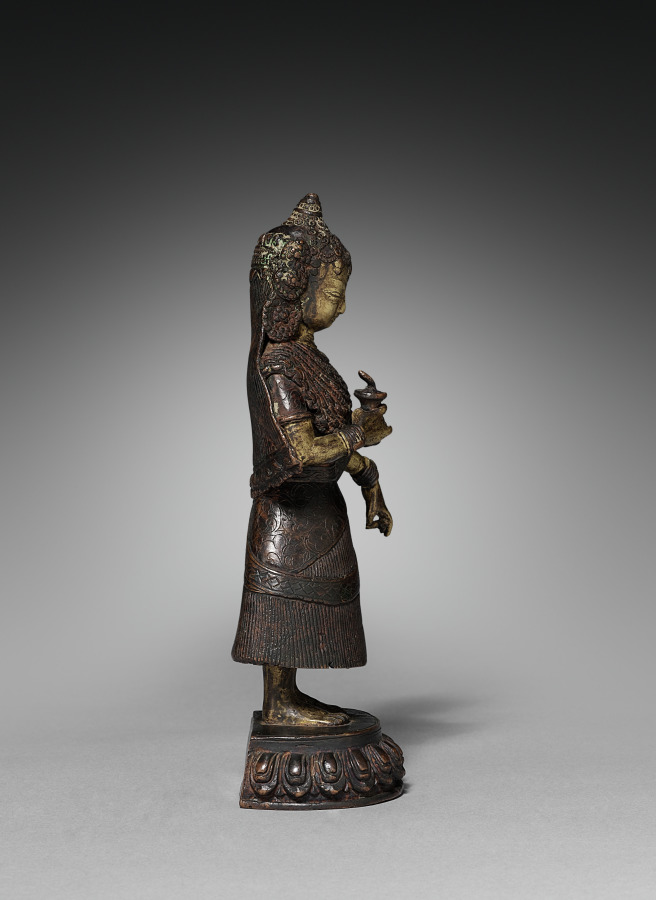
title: Royal Female Donor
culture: Nepal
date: c. 1500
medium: bronze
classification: Sculpture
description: Carrying a lamp in one hand, this female figure draped in finery was probably included as the donor of a sculptural group. She wears a complex headdress consisting of a network of beads and plaques joined together, ending in a bell at her forehead and crowning a long cloth that reaches to her waist. Her position on a lotus flower may indicate the transcendent state she attained as a result of the karmic merit of her donation.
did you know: The pleated skirt tied with a scarf around her waist is characteristic of Nepal.